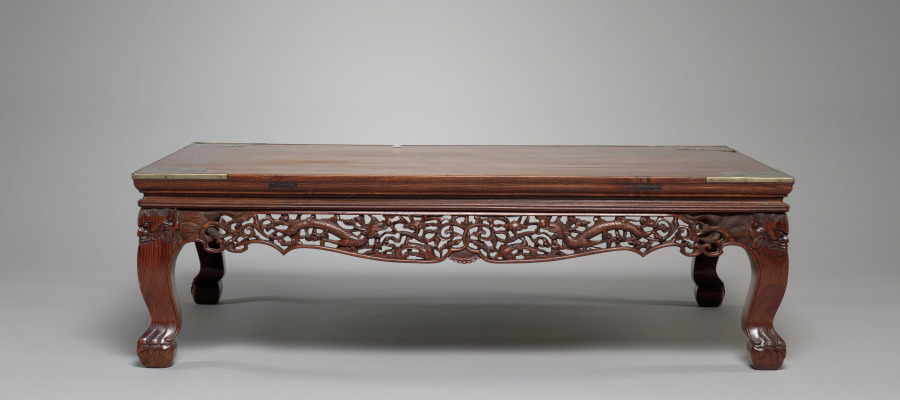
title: Low Table (kang zhuo) with Dragons in Clouds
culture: China, Ming dynasty (1368-1644) or Qing dynasty (1644-1911)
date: 1600s–1700s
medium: Rosewood (huanghuali) and metal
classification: Furniture and woodwork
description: Originally, low tables were placed on a kang, a raised platform made of brick and heated by a fire underneath, which served as a bed and living space on cold winter days in northern China. During the daytime, these platforms could accommodate two sitters with a kang table placed between them. In the warmer south, kang tables were used on daybeds made of wood. By the Ming and Qing dynasties, furniture makers used rare tropical hardwood, such as huanghuali, known as rosewood.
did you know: Note the curved legs, the elaborate openwork carving, and metal-fitted corners in the form of bats.